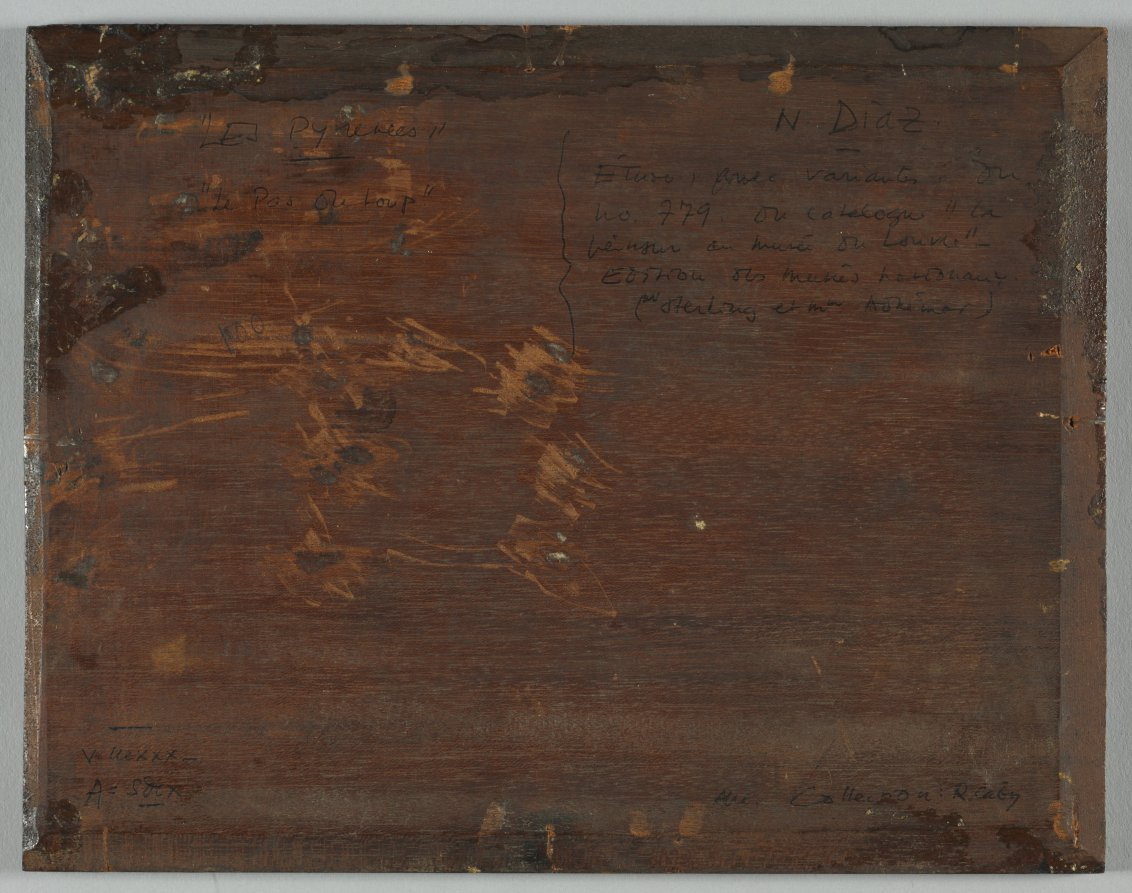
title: The Pyrenees, the Peak of the Midi de Bigorre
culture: France, 19th century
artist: Narcisse Diaz de la Peña (French, 1807–1876)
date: 1871–1872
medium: oil on wood panel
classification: Painting